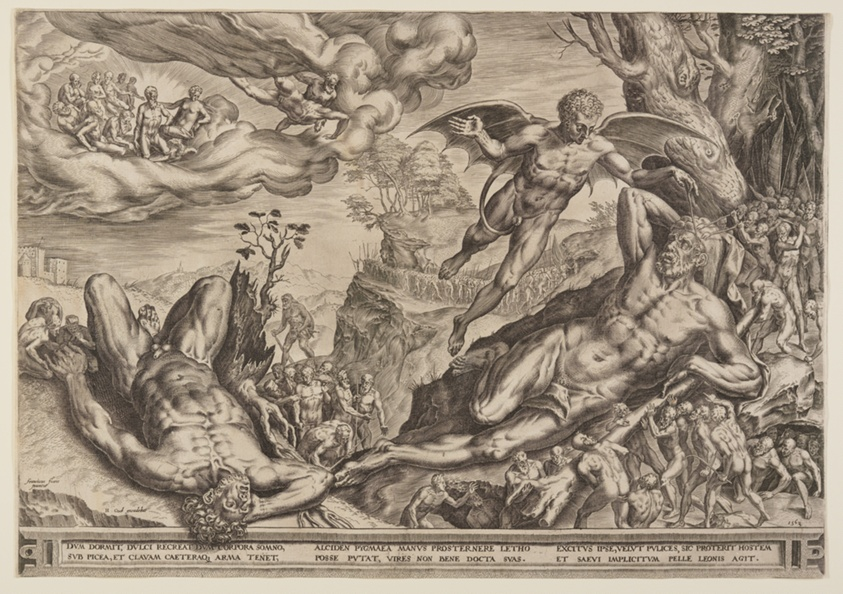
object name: Print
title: Hercules besieged by Pygmies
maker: Cornelis Cort (Netherlandish, 1533–before 1578); after Frans Floris I (Netherlandish, 1519/20–1570)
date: 1562-63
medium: Engraving on ivory laid paper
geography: Netherlands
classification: engraving; paper; print; prints and drawing